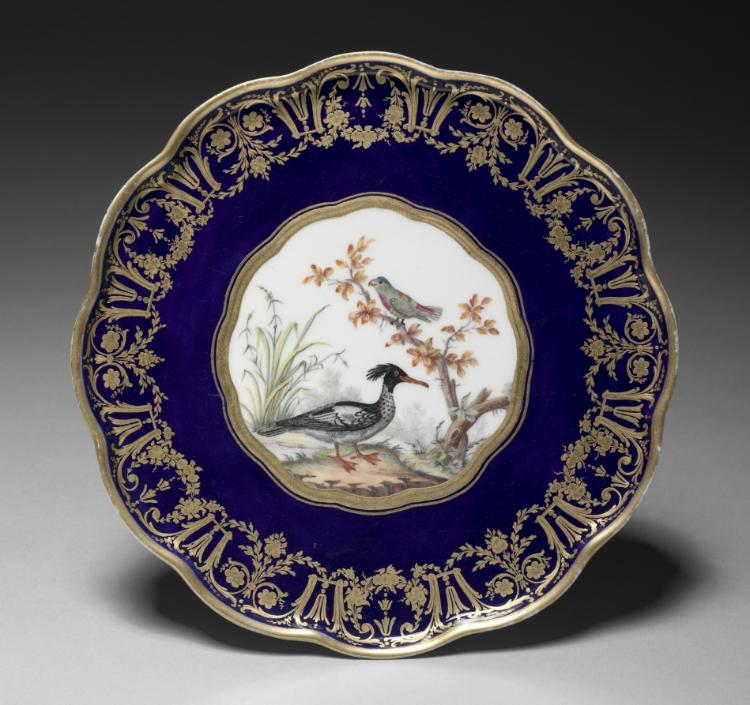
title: Footed Dish (soucoupe à pied)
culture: France, Sèvres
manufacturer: Sèvres Porcelain Factory (French, est. 1756)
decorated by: Etienne Evans (French, 1733–1806)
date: 1786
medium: soft-paste porcelain with enamel and gilt decoration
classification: Ceramic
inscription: [Painted in blue, beneath base]: "Harle hupé, Mâle"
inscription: [Incised twice]: "22"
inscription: [Interlaced Ls with date letter]: "ii"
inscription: Painter's mark of a dagger for Etienne Evans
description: These dishes may have supported cups of sweet ices or pyramidal displays of fruits or sweetmeats as part of a dessert or tea service. On the reverse of the plate the two birds pictured are identified as a Petit Perruche, du Pérou (budgerigar from Peru) and Harle huppé, Mâle (male red-breasted merganser.) Their images were modeled after engravings in naturalist Georges-Louis Leclerc’s Natural History of Birds, a book which regularly inspired Sèvres porcelain paintings in the 1780s and 90s.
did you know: The dark blue ground that rings the edge of this plate is known as beau bleu (beautiful blue) and derived its color from cobalt added to the enamel.